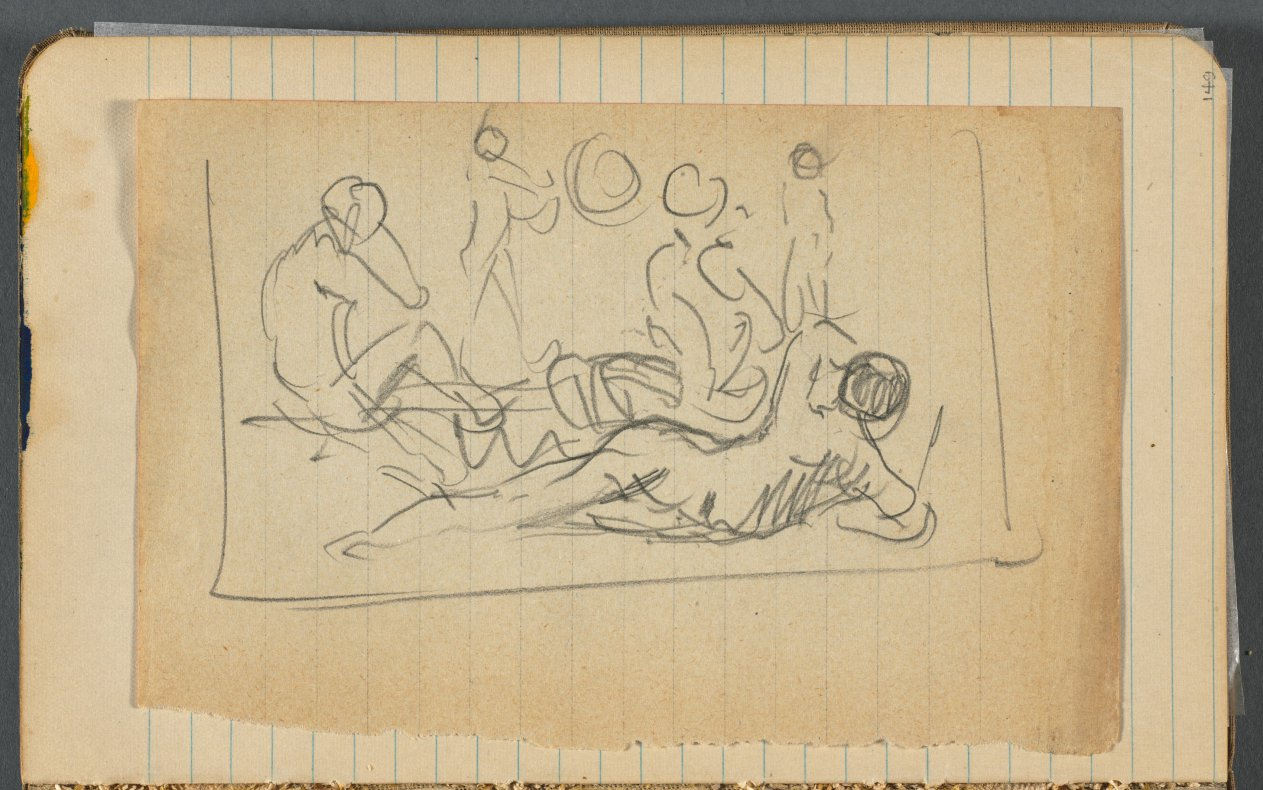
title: Sketchbook, loose sheet between pgs. 148 & 149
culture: America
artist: Maurice Prendergast (American, born Newfoundland [now Canada], 1858–1924)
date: 1905–10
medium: graphite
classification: Bound Volume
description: This sketchbook contains 69 pages of drawings, a diary largely devoted to the state of the artist's health, and a three-page discourse on the nature of genius and ideas.